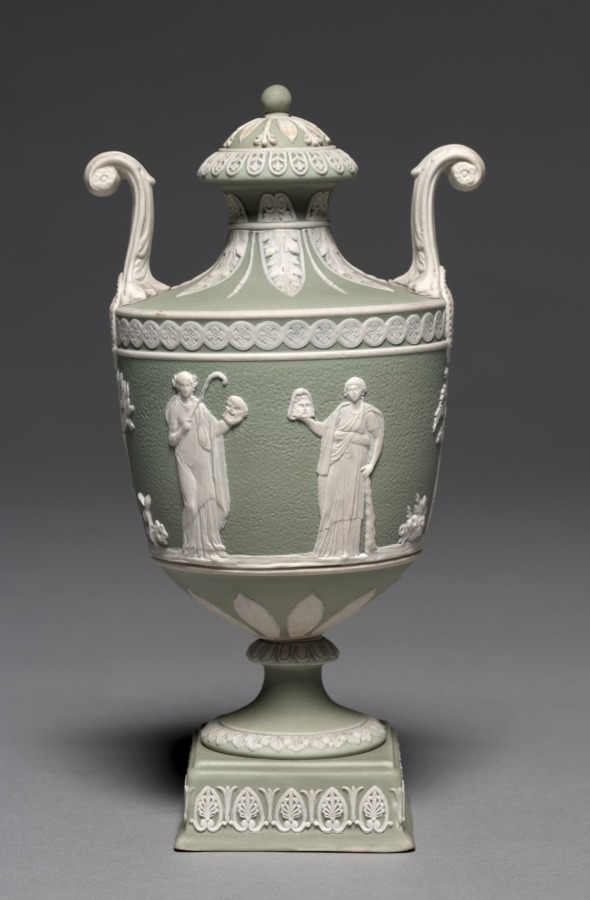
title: Covered Urn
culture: England, Staffordshire, late 18th-early 19th Century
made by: Wedgwood Factory (British)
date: c. 1800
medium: jasper ware with relief decoration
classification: Ceramic